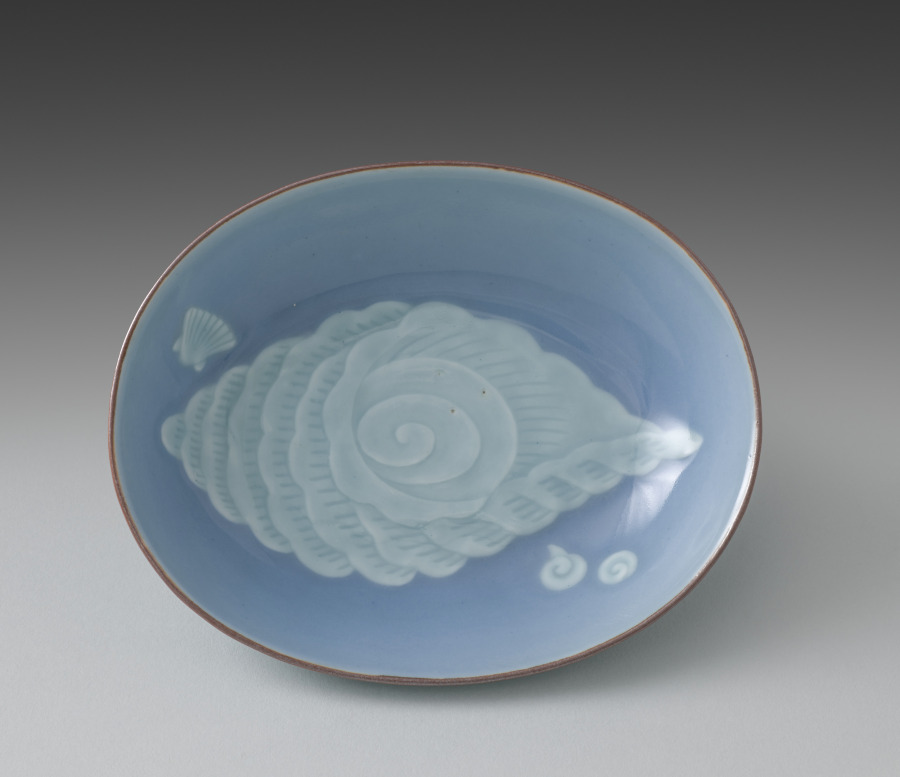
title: Dish from Dishes with Shells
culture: Japan, Taishō period (1912–26)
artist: Seifū Yohei IV (Japanese, 1872–1951)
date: 1914–46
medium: One from a set of five dishes; porcelain with blue glaze, iron oxide, and molded design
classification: Ceramic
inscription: 清風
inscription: 清風造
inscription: 清風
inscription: 成山清風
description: Yohei IV chose an aquatic theme for this set of five mukōzuke, side dishes. He added an iron oxide rim and used a concentrated blue glaze on both the interior and exterior. The glaze, named on the box lid, is his father’s “evening moon” (tsukiyoi) color. The conch in relief takes up the entire bottom of the dish. Up the sides are two snails on one end and on the other a scallop. This results in a boldly graphic, less realistic effect.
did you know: This set of dishes, mukōzuke, could be used for serving small side dishes at a tea gathering.